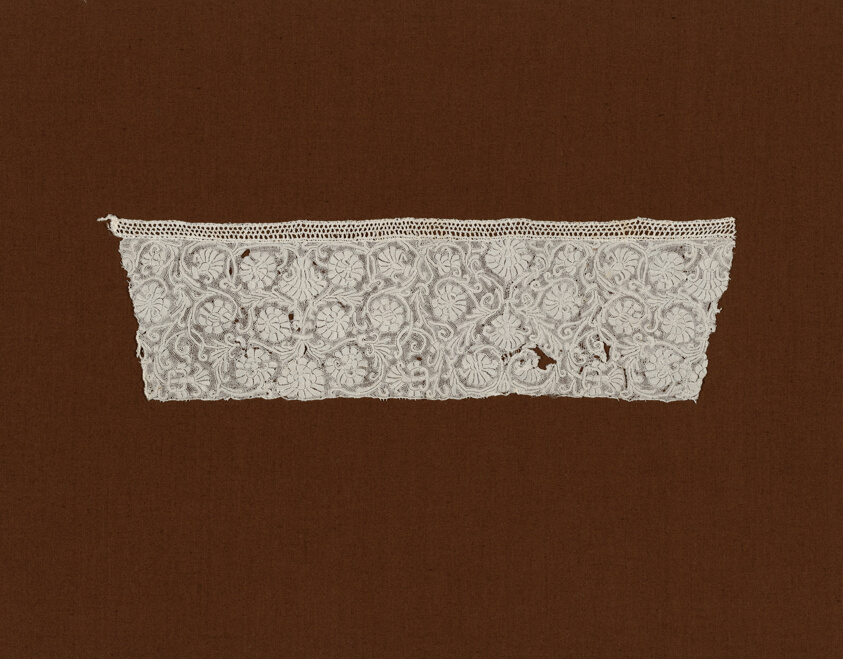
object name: Textile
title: Border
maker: Belgium, Flanders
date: 1634/66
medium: Linen, needle lace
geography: Flanders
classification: textile; lace - needle; lace